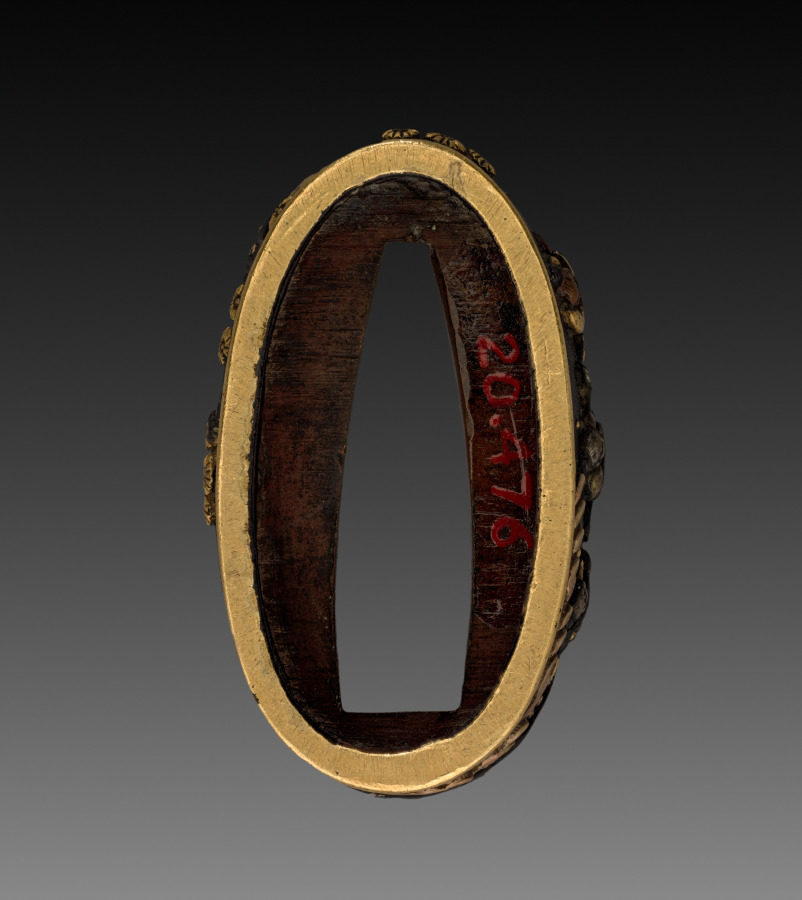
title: Sword-Hilt Collar (Fuchi)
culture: Japan, Edo period (1615–1868)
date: 1700–1850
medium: shakudo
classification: Arms and Armor